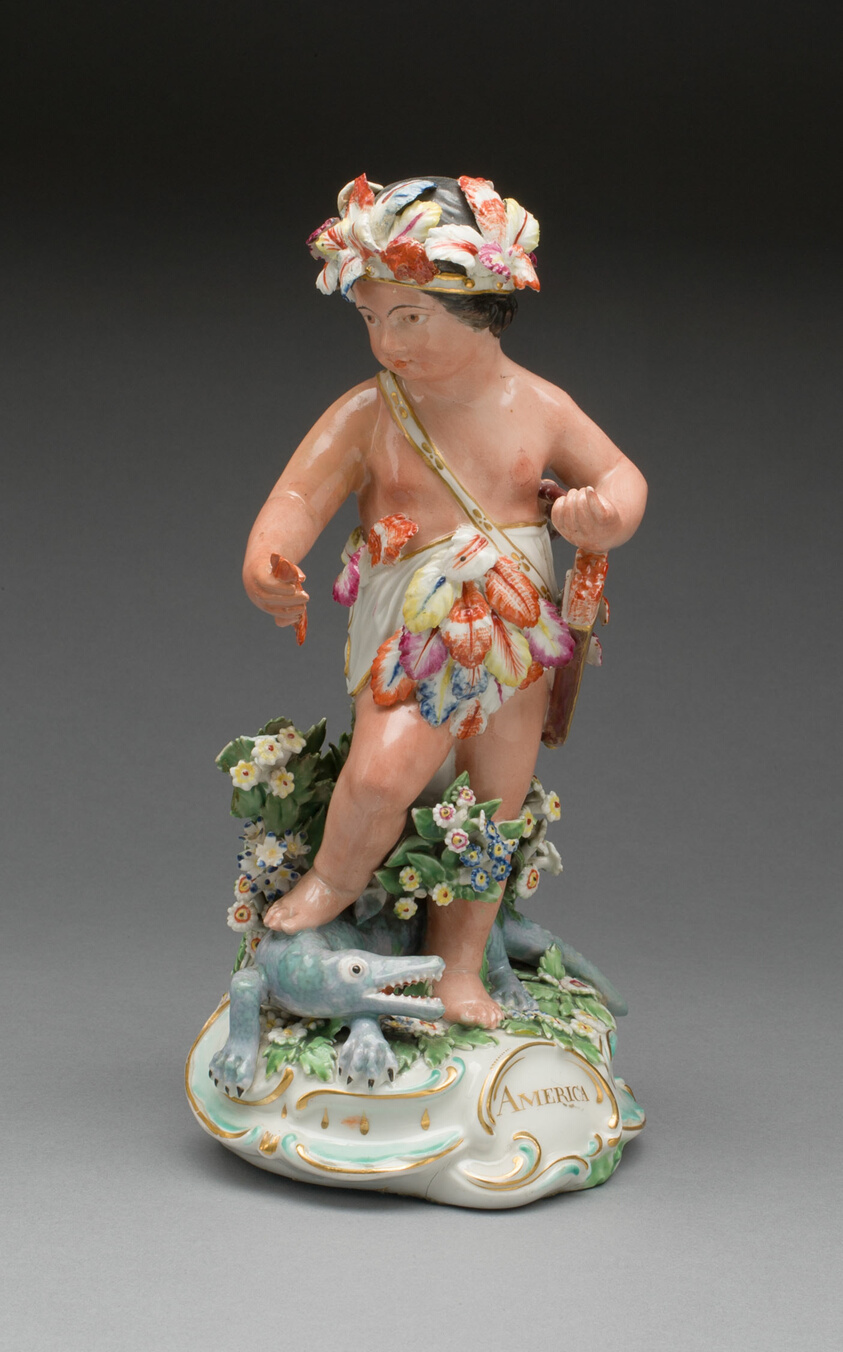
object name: Ceramics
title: Allegorical Figure of America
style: Rococo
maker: Derby Porcelain Manufactory (England, 1750-1848)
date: 1770/80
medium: Soft-paste porcelain with polychrome enamels and gilding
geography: Derby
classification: sculpture; ceramics; porcelain; european decorative arts